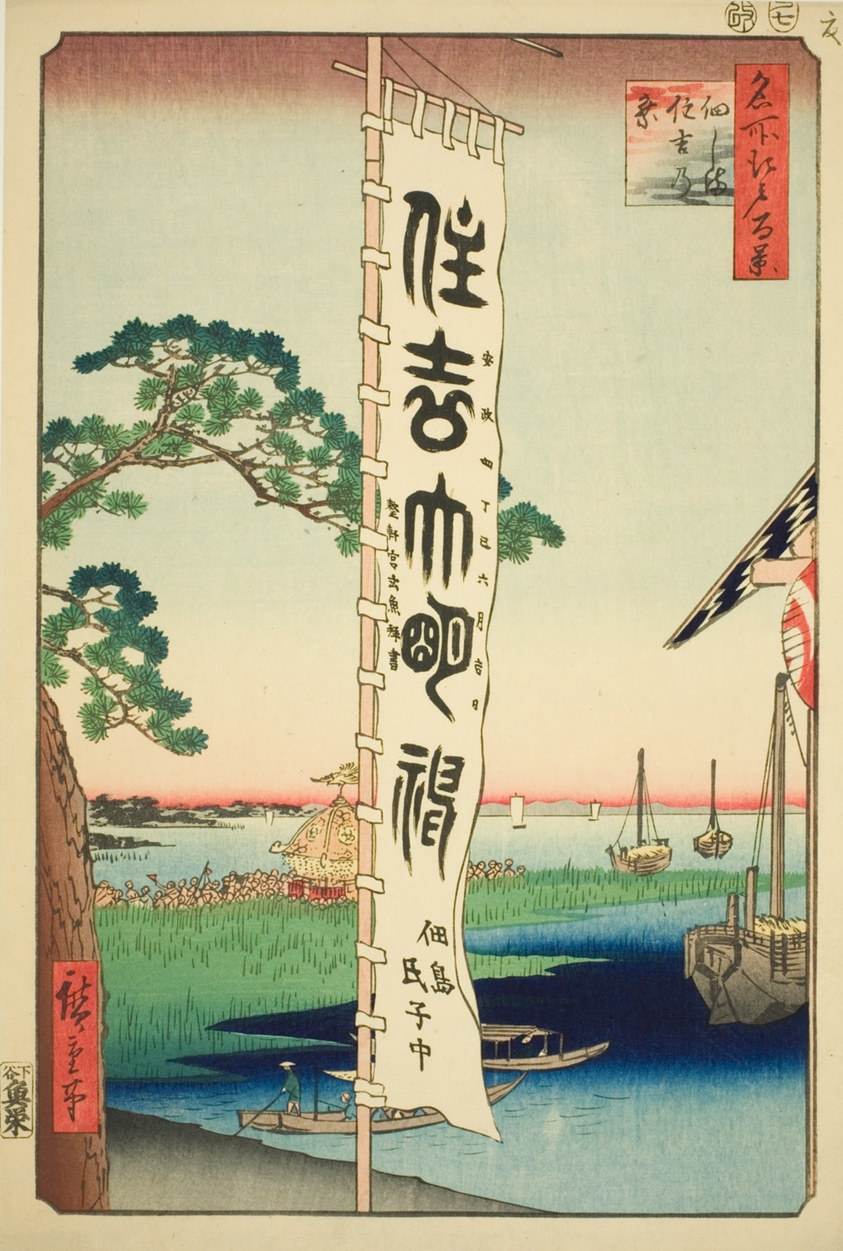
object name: Print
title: Sumiyoshi Festival at Tsukuda Island (Tsukudajima Sumiyoshi no matsuri), from the series "One Hundred Famous Views of Edo (Meisho Edo hyakkei)"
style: Japanese (culture or style)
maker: Utagawa Hiroshige 歌川 広重; Japanese, 1797-1858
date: 1857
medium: Color woodblock print; oban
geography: Japan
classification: woodblock print; print; asian art